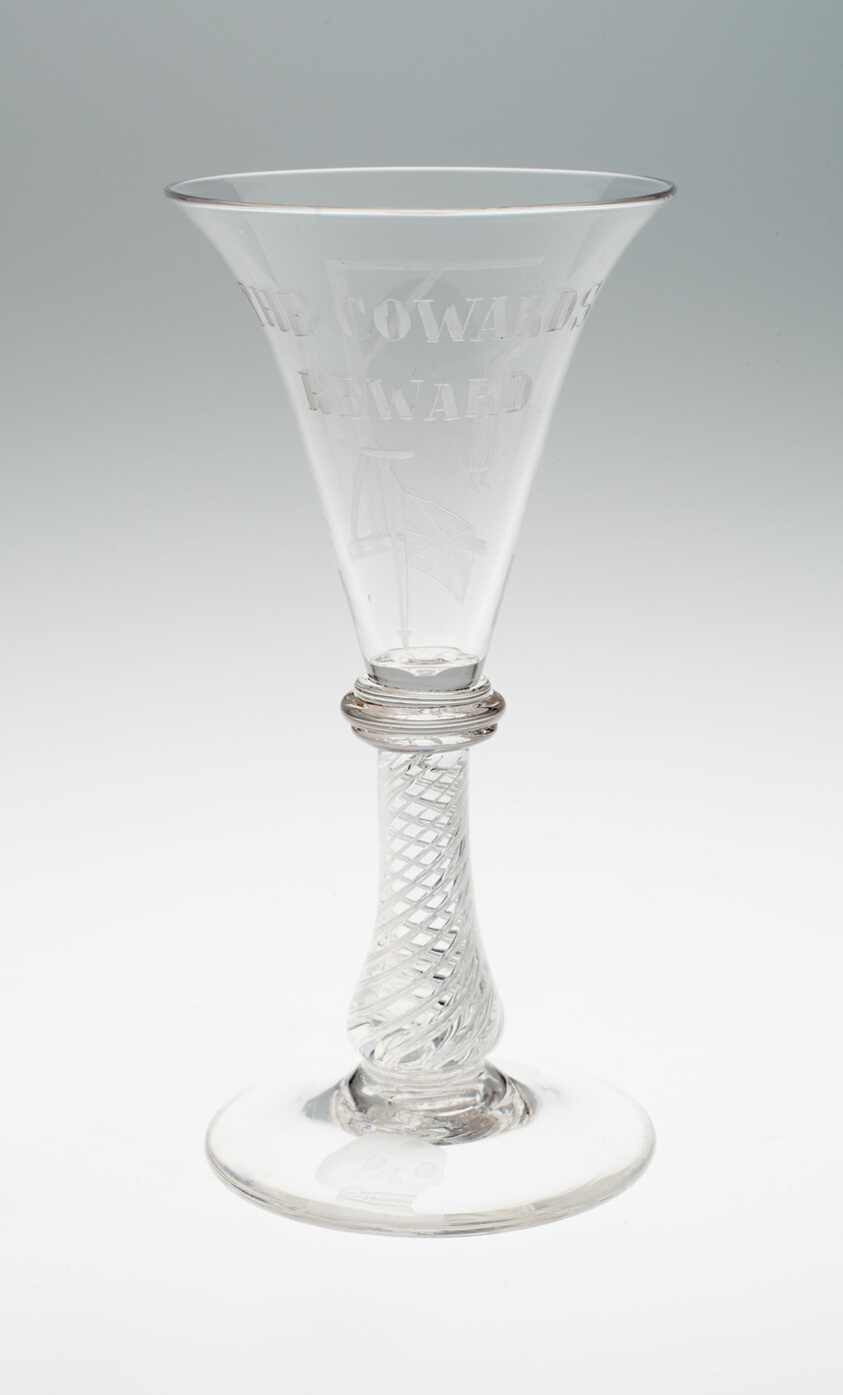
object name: Glass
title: Wine Glass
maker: England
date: 17th century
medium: Glass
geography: England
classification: drinking vessel; glass; european decorative arts